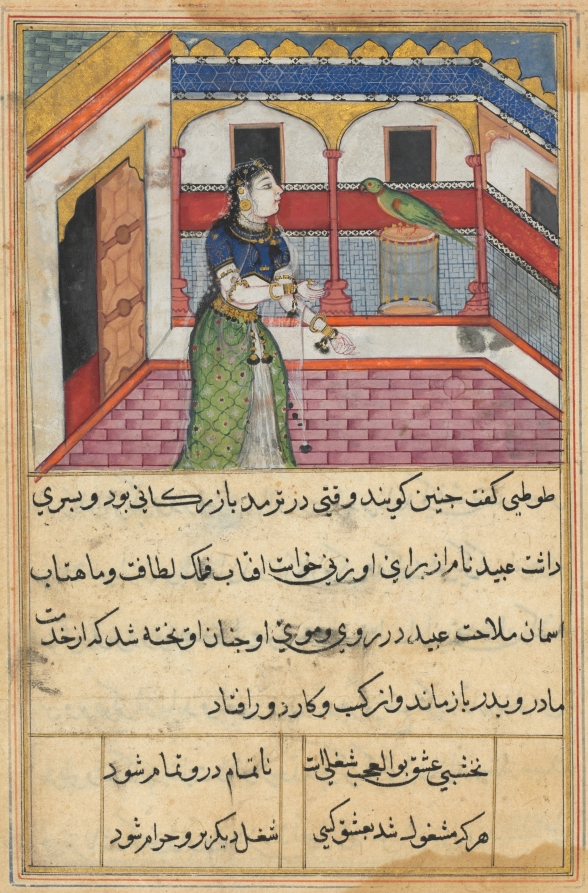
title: The parrot addresses Khujasta at the beginning of the forty-second night, from a Tuti-nama (Tales of a Parrot)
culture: Mughal India, court of Akbar (reigned 1556–1605)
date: c. 1560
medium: gum tempera, ink, and gold on paper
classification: Painting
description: As the sun sets on the forty-second night Khujasta reproaches Tuti, accusing him of keeping her away from her lover. Tuti responds by telling Khujasta a story about a merchant’s son who similarly received wise advice from a talking parrot. By the time the story ends, it is too late for Khujasta to visit her lover.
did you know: The carved door on the left appears to be made of wood.